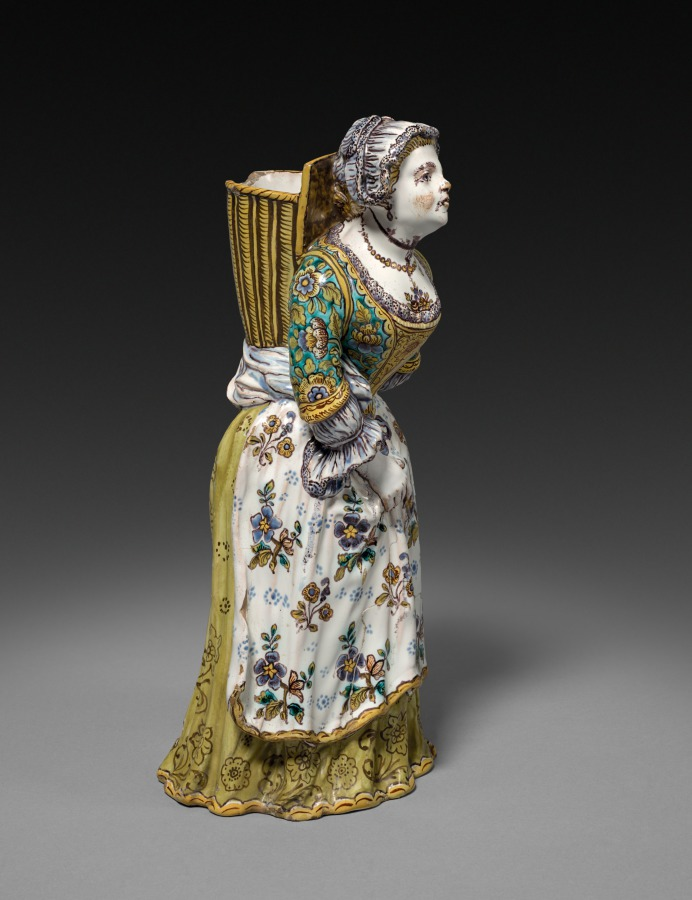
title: Figure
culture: France, Strasbourg, 18th century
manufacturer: Strasbourg Factory (France)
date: 1745–50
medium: faience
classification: Ceramic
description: For several decades in the middle of the 18th century the Hannong family were proprietors of one of the best and most influential French faience factories at Strasbourg. Here German and French ceramic styles and techniques met and were fused. These figures were copied from a pair executed in Chantilly porcelain which in turn relied on a Meissen prototype.